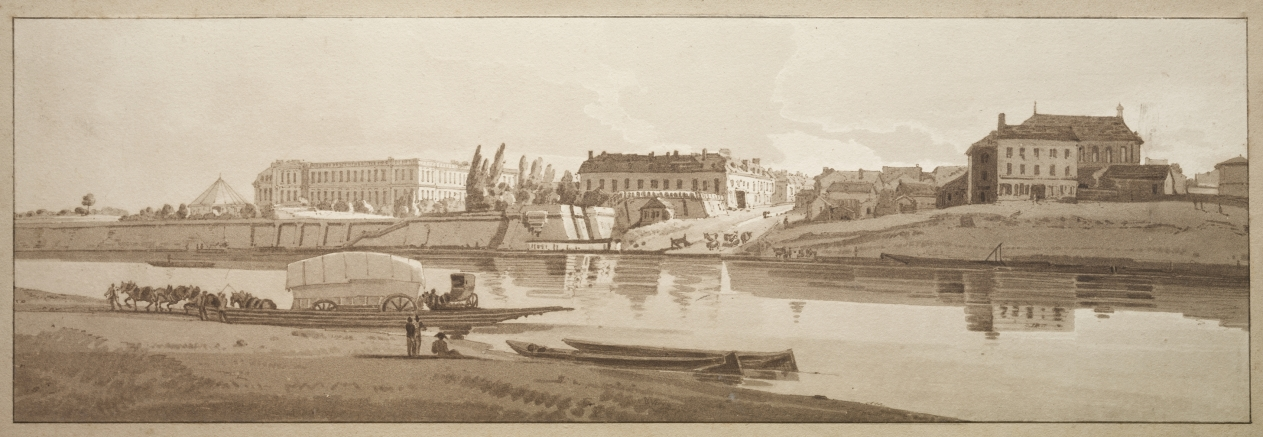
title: A Selection of Twenty of the Most Picturesque Views in Paris: View of the Palace & Village of Choisi on the Banks of the Seine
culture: England, 19th century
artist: Thomas Girtin (British, 1775–1802)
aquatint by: Frederick Christian Lewis (British, 1779–1856)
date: 1802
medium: softground etching and aquatint printed in brown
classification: Print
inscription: Lower margin, in pencil: View of the Palace & Village of Choisi Early proof